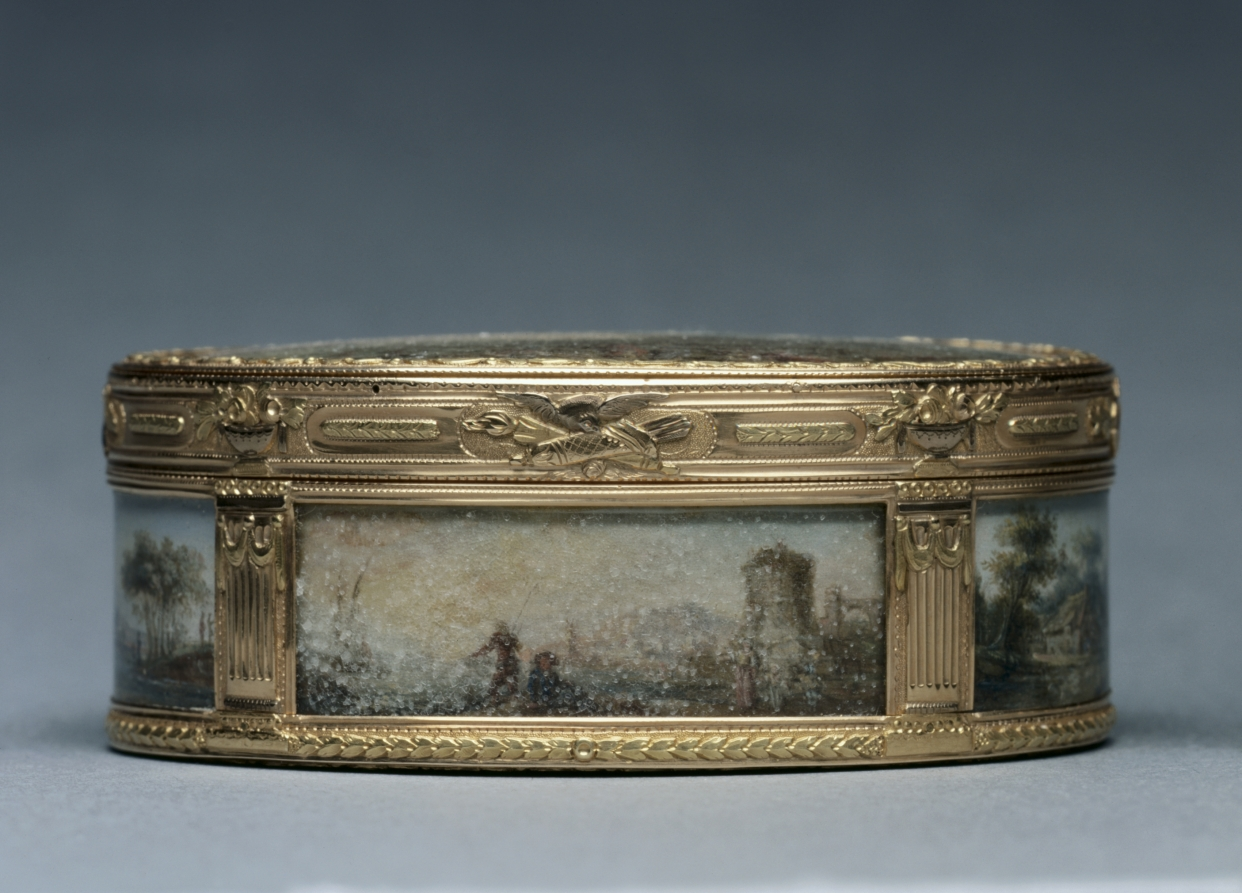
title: Snuff Box (Tabatière)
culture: France, 18th century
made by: Pierre-Nicholas Pleyard (French)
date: 1768–69; 1776–78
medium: gouache miniatures mounted on gold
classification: Metalwork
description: Snuff boxes were highly ornamented functional objects popular among French social elites. They were simultaneously containers for powdered tobacco and a means to communicate social and political status. Often decorated with miniature paintings inspired by popular paintings of the time, the works reproduced on this box are modeled after those of Claude-Joseph Vernet (cover and front panel) and David Teniers the Younger (base, side, and back panels).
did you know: These miniature paintings are mounted à cage, a practice popular in the mid-1700s that involved setting decorated panels into gold frames to create a box’s walls.